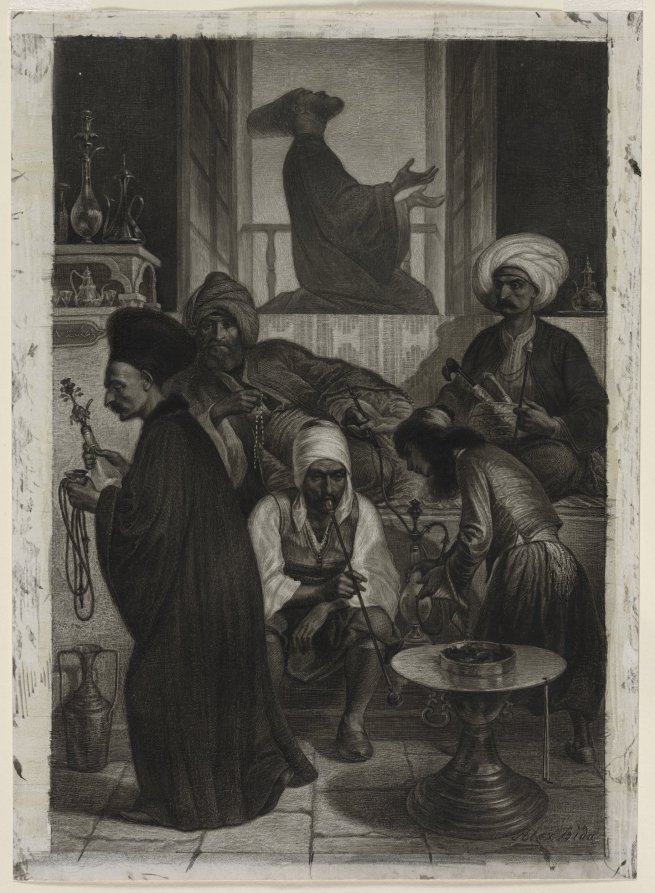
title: Café in Constantinople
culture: France, 19th century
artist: Alexandre Bida (French, 1823–1895)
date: 1847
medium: brush and black and gray ink, graphite, and stylus on white wove paper coated with a white ground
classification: Drawing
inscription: signed, lower right, in black ink and stylus: Alex Bida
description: This precise and carefully finished work reflects an unusual technique. Building up the entire area with ink and graphite over white chalk, Bida used a stylus to scratch a comprehensive network of tiny lines, providing highlights and picking out details. For his Orientalist subjects, Bida traveled repeatedly to the Near East-the first time in 1843 when he went to Constantinople and Syria from Venice. Although he closely observed the costumes and people encountered overseas, the decorative arrangements and symmetrical space in this draw-ing exemplify the theatrical aspects of Bida's art.